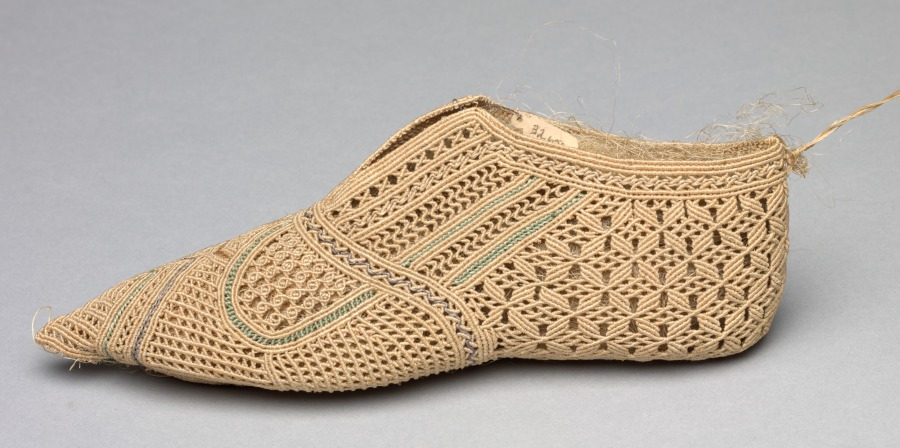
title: Shoe (one of a pair)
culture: Philippines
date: 1850s-1920s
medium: Abacá fiber: macramé knotted lace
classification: Garment